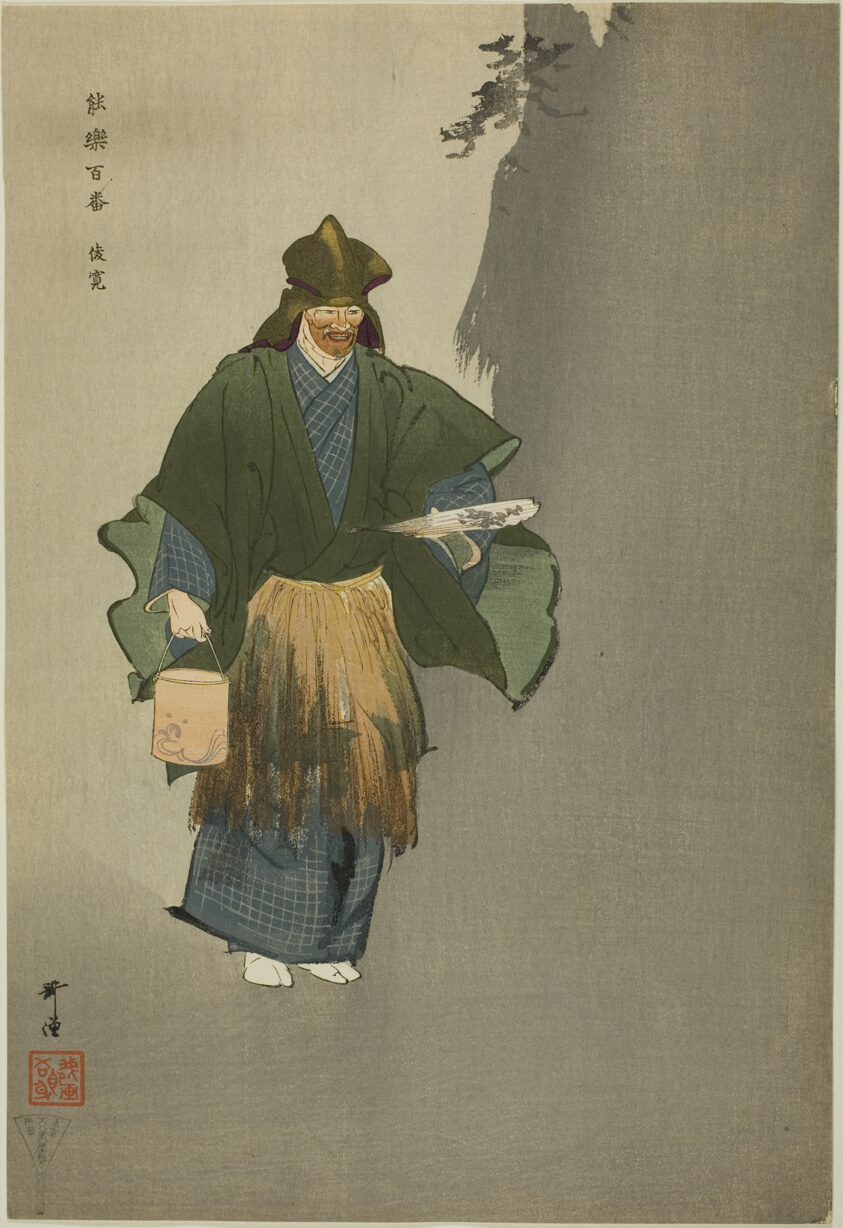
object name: Print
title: Shunkan, from the series "One Hundred No Dramas (Nogaku hyakuban)"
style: Japanese (culture or style)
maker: Tsukioka Kogyo; Japanese, 1869-1927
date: 1898/1903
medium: Color woodblock print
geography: Japan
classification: woodblock print; print; asian art